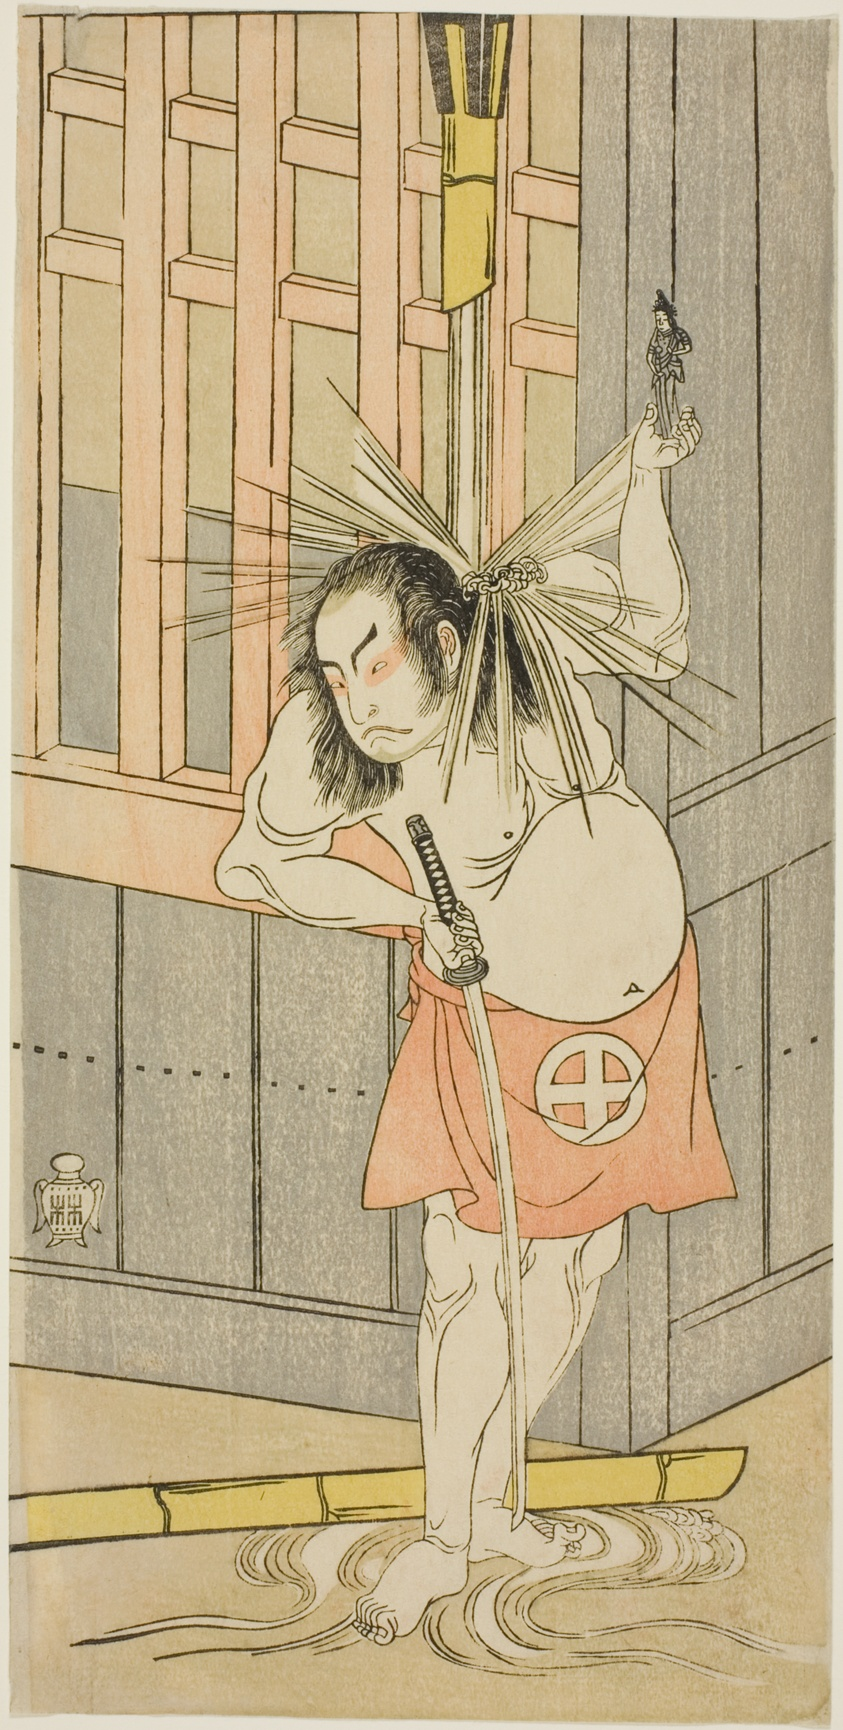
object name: Print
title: Actor Ôtani Hiroji III Possibly as Akaneya Hanshichi in “Snow on Mt. Fuji: The Soga Vendetta” (“Fuji no yuki kaikei Soga”)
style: Japanese (culture or style)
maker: Katsukawa Shunshô 勝川 春章; Japanese, 1726-1792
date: About 1770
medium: Color woodblock print; hosoban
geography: Japan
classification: woodblock print; print; asian art